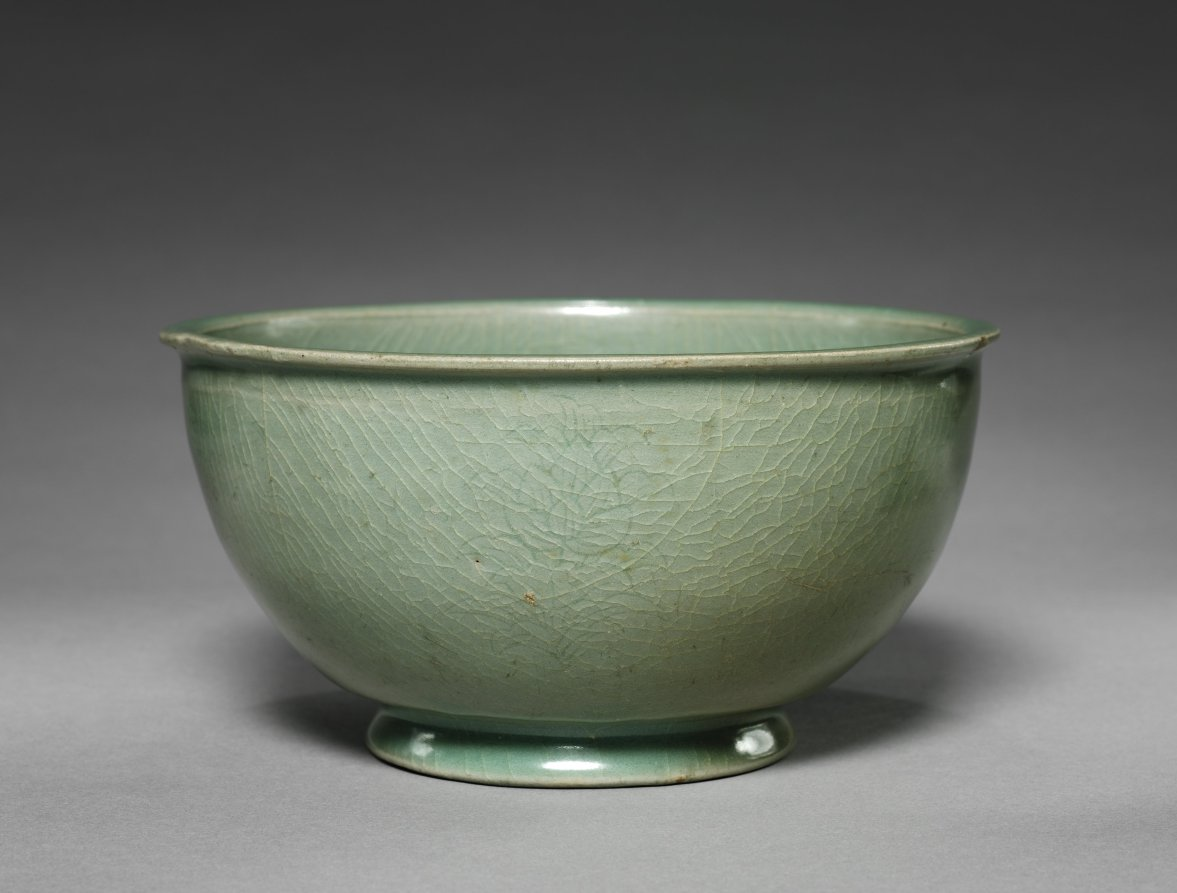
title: Bowl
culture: Korea, Goryeo dynasty (918–1392)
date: 1100s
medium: pottery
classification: Ceramic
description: As early as the seventh century, the practice of drinking tea and wine became an important part of elite culture in Korea. Elites of the Goryeo period commissioned a variety of types of utensils and vessels including this large bowl paired with a shallow saucer, to make their drinking experience more exciting.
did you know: The crackle pattern that appears all over this bowl was caused by a thermal expansion mismatch between the body and the glaze.